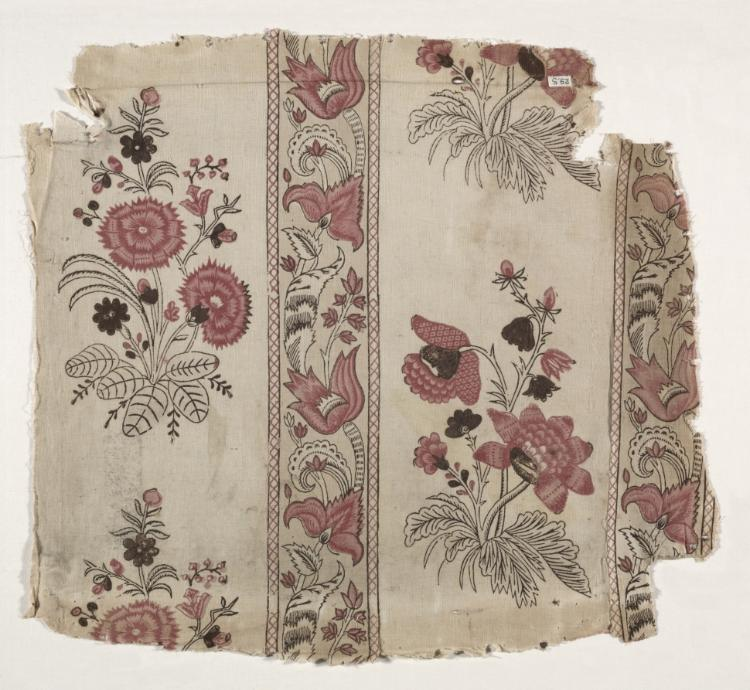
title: Strip of Woodblock Printed Linen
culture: France, late 18th century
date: c. 1785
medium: woodblock print on linen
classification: Textile